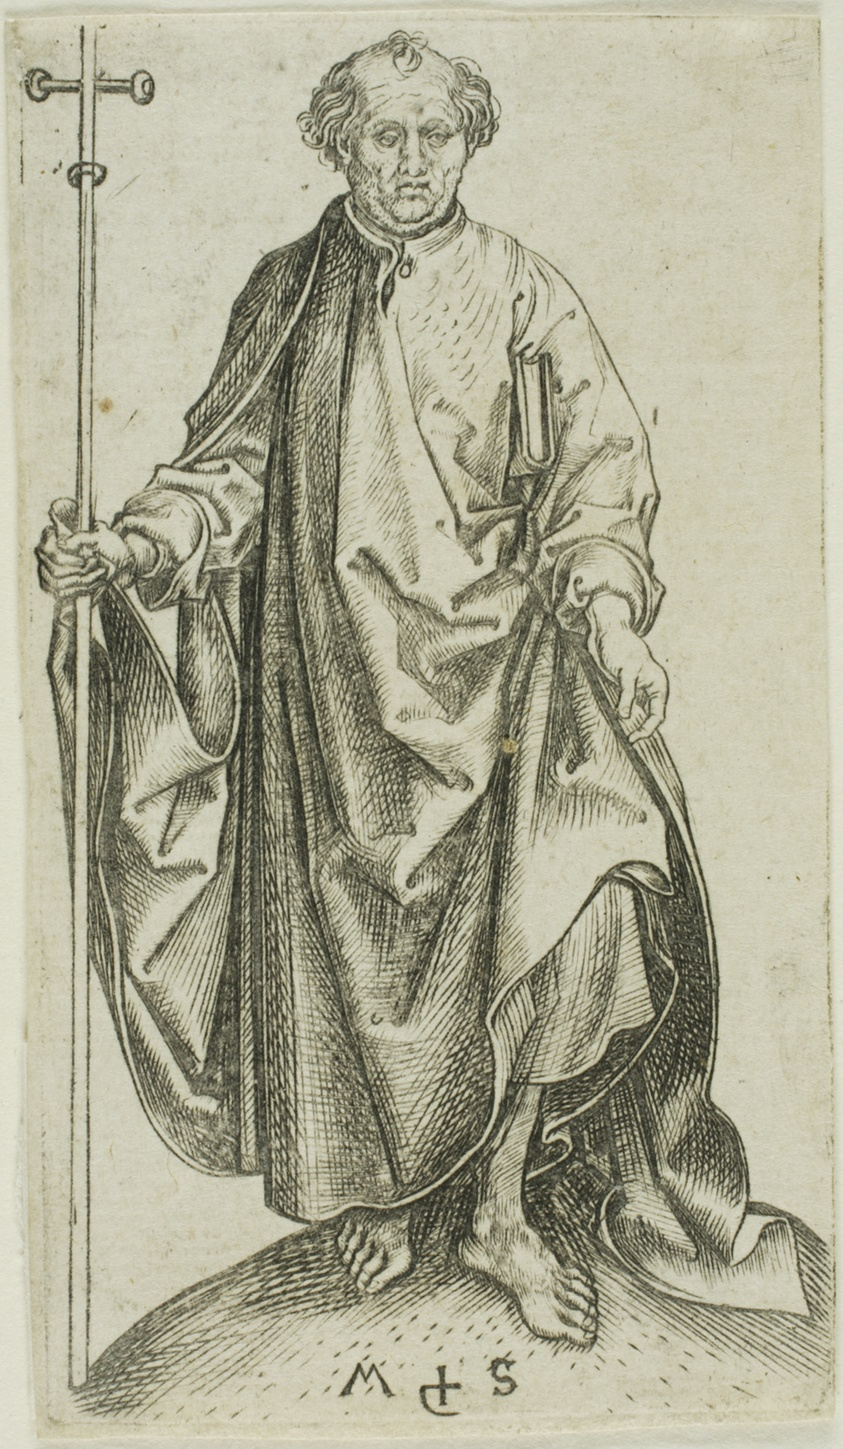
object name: Print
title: St. Philip, from Apostles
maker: Martin Schongauer (German, c. 1430/50-1491)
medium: Engraving on paper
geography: Germany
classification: engraving; print; prints and drawing